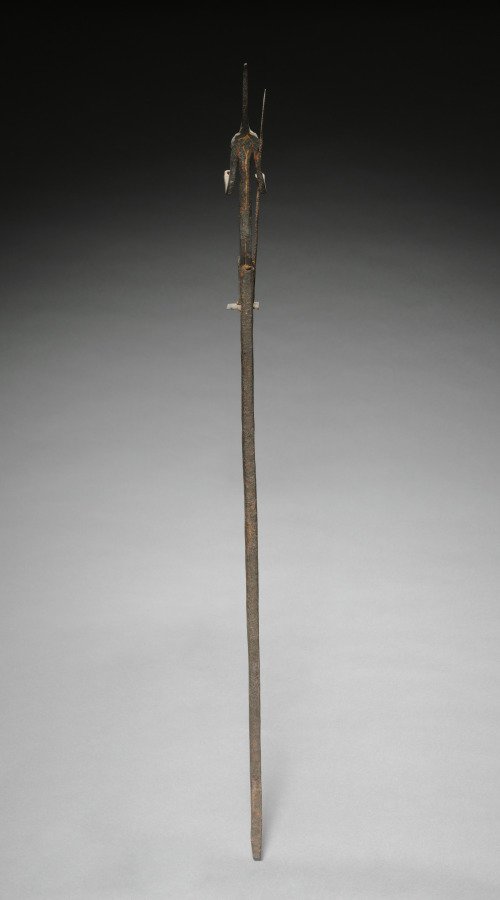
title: Staff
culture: Africa, West Africa, Mali, Bamana-style blacksmith-carver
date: 1900s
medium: Iron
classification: Implements